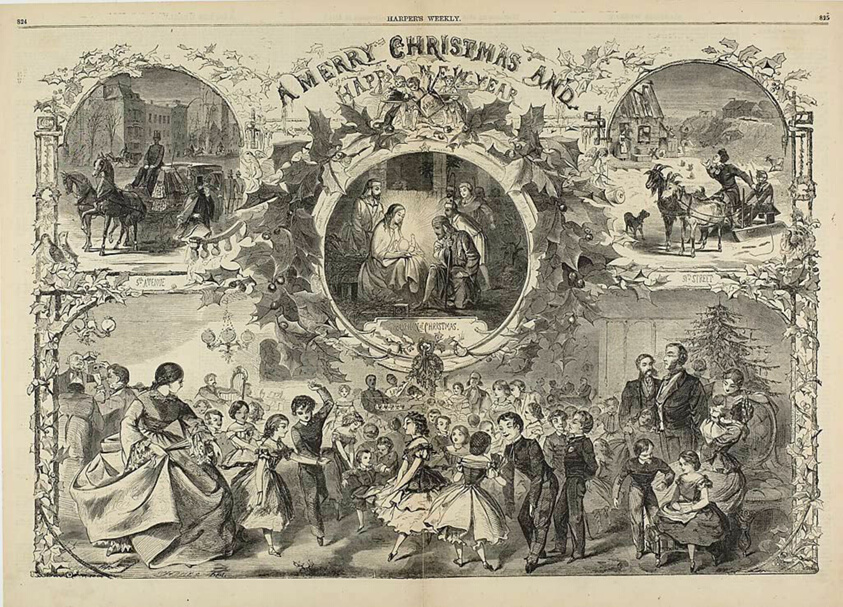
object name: Print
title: A Merry Christmas and a Happy New Year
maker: Winslow Homer (American, 1836-1910); published by Harper's Weekly (American, 1857-1916)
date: published December 24, 1859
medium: Wood engraving on paper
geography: United States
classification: wood engraving; print; prints and drawing